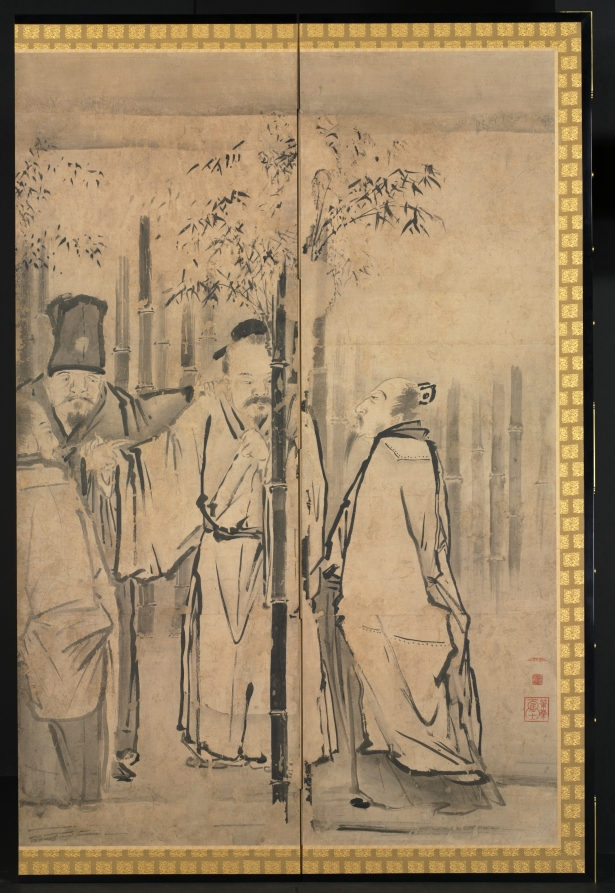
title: Seven Sages of the Bamboo Grove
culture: Japan, Edo period (1615–1868)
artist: Kano Tan’yū (Japanese, 1602–1674)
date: 1600s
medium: pair of six-fold screens; ink on paper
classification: Painting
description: The Kano school was a group of professional artists patronized by the shogun from the late Muromachi period to the Edo period. The group adopted themes of reclusiveness to convey the importance of loyalty to the shogunate. A leader of the Edo Kano school, Kano Tanyu paired Seven Sages of the Bamboo Grove and Four Elders of Mt. Shang to reference a painting of the same theme attributed to Kano Motonobu. Seven Sages of the Bamboo Grove refers to the elites who escaped the social chaos of China’s Wei-Jin period (AD 200s–400s); they fled to a secluded bamboo grove where they could express themselves freely, enjoying pure conversation, music, and wine. The other screen, Four Elders of Mt. Shang, depicts the scholars who left the turbulence of the late Qin dynasty to pursue their scholarly interests in seclusion on Mt. Shang in Shanxi province.